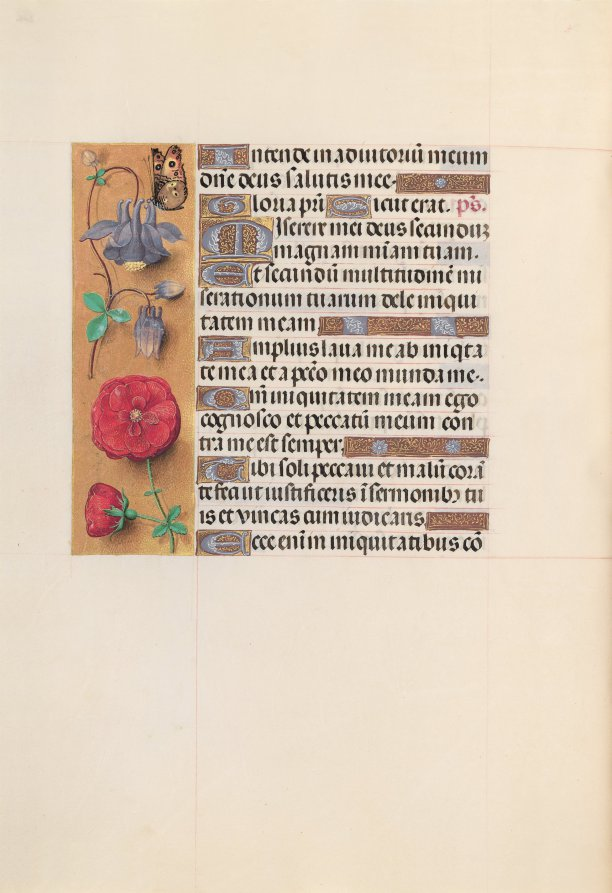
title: Hours of Queen Isabella the Catholic, Queen of Spain: Fol. 204v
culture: Flanders, Ghent and Bruges, late 15th century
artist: Master of the First Prayerbook of Maximillian (Flemish, c. 1444–1519)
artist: and Associates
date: c. 1500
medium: ink, tempera, and gold on vellum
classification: Bound Volume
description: This manuscript was illuminated by a circle of at least five highly organized manuscript painters active in the Flemish cities of Ghent and Bruges. The principal illuminator was Alexander Bening, who painted the majority of the book's miniatures. Manuscripts produced by this circle of artists are renowned for the decoration of their borders, which typically feature a rich variety of realistically-painted flowers, birds, and butterflies. This prayer book, called a book of hours, was intended not for a cleric, but for the private devotions of a lay person-in this case, Isabella the Catholic, Queen of Spain (1451-1504). Isabella's coat of arms embellishes the book's frontispiece. It is unlikely that the book was commissioned by the Queen herself; rather, she probably received it as a diplomatic gift from someone courting her patronage, perhaps Cardinal Francisco Jimenez de Cisneros. A Franciscan friar, Jimenez was dependent upon Isabella for his advancement, first to the post of Queen's confessor in 1492, and then to Archbishop of Toledo in 1495.